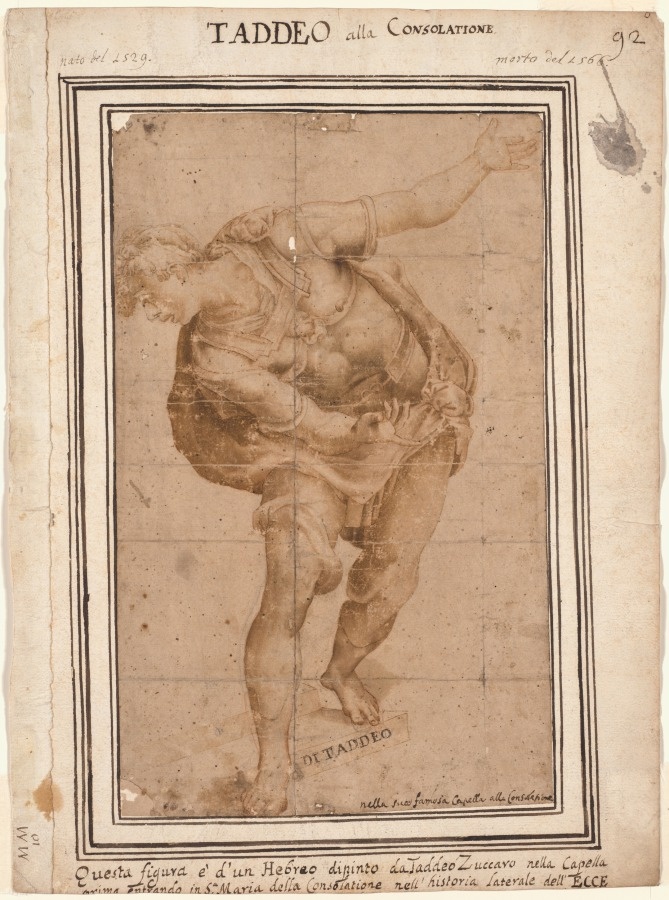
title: Un Hebreo, from Christ Shown to the People (recto); Design for a Wall Decoration with Pasted-in Sketches after Raphael (verso)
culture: Italy, 16th century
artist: Frederico Zuccaro (Italian, 1540/1–1609)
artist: after Taddeo Zuccaro (Italian, 1529–1566)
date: after 1556 (recto), c. 1580s-90s (verso)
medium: Brown wash with outlining in pen and brown ink and red chalk, with traces of black chalk (recto); Pen and brown ink with brown wash over red chalk and traces of pencil, the three pasted-in compositional sketches in black chalk laid down on an album sheet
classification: Drawing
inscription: RECTO: annotated by Resta in pen and brown ink in the lower right corner of the drawing: nella sua famosa Capella alla Consolatione; on the front of the step beneath the figure's left foot: DI TADDEO; the album sheet is further annotated in pen and brown ink at the top margin: TADDEO alla CONSOLATIONE / nato del 1529. Morto del 1566; lower margin: Questa figura è d'un Hebreo dipinto da Taddeo Zuccaro nella Capella prima entrando in Sa. Maria della Consolatione nell'historia laterale dell'ECCE; paginated in pen and brown ink at top right corner: 92; an inventory number (?) in the lower left corner: MM/10 VERSO: annotated by Resta on the album sheet in pen and brown ink, left margin: di Fed. Zuccaro l'ornamt[i] / le figure riportate nei vani sono di Taddeo